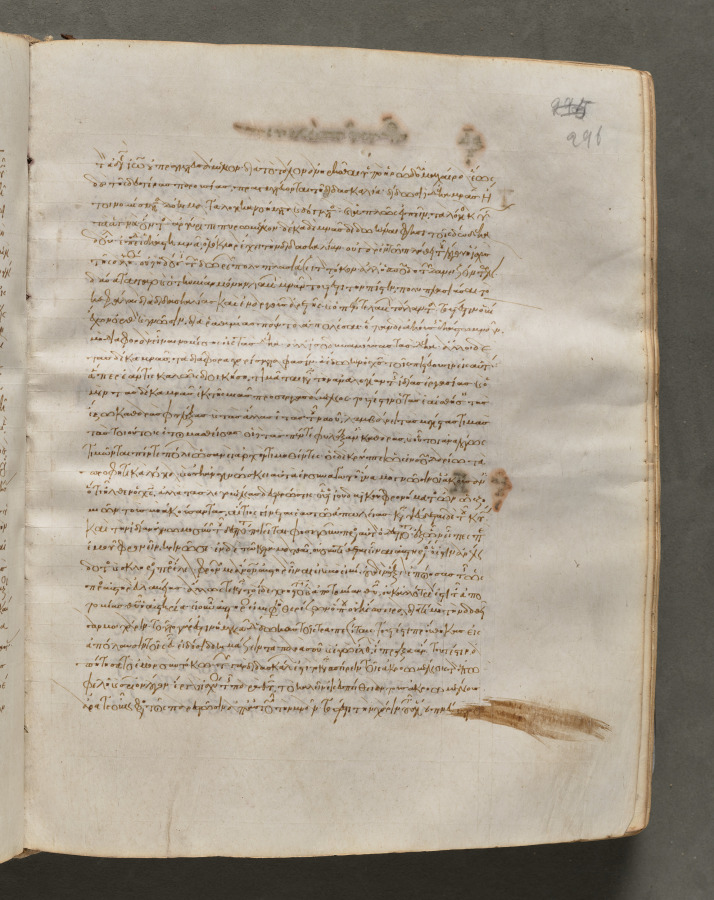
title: Text, folio 296 (recto), from a Gospel Book with Commentaries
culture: Byzantium, Constantinople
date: c. 1000–1100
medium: ink, tempera, and gold on vellum; leather binding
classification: Bound Volume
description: Each of the four gospels in this book opens on a page with brilliantly illuminated borders depicting the author of the text as well as birds—principally peacocks, symbols of the immortality of the soul—and fountains, representing the fountain of life and the salvation of the soul. This volume consists of 428 leaves with texts in Greek. Its level of sophistication suggests that it was probably written and decorated in a monastery in Constantinople.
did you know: Gospel books were carried in procession through Byzantine churches.